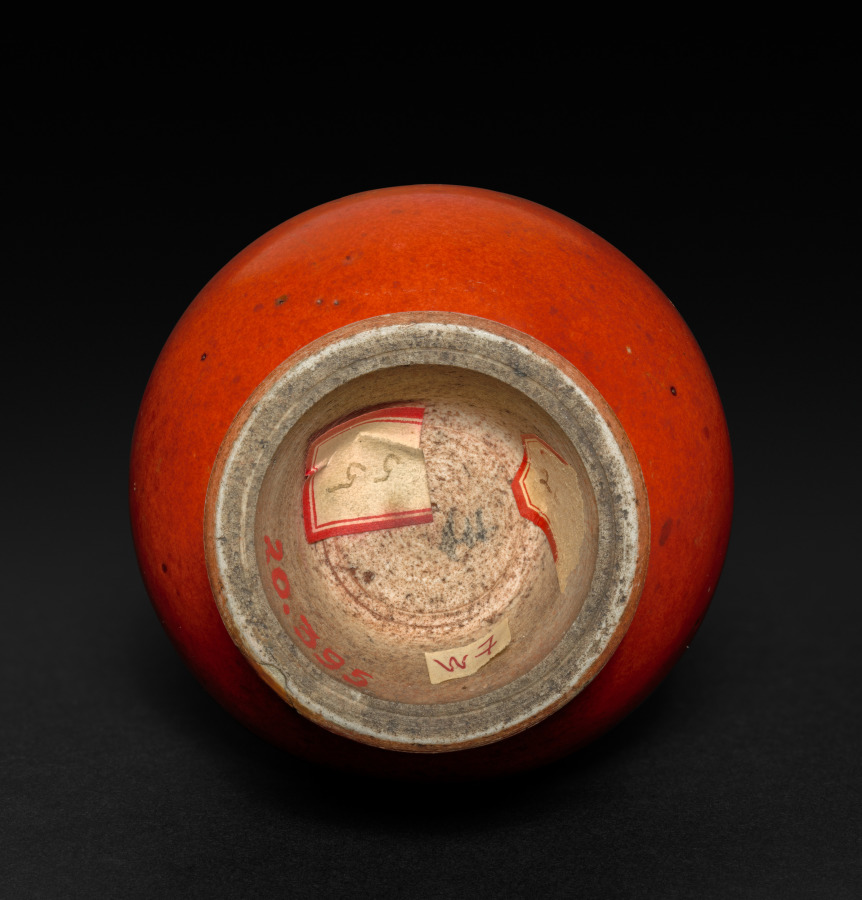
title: Vase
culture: China, Jiangxi Province, Jingdezhen kilns, Qing dynasty (1644–1911), Yongzheng reign (1722–35)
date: 1723–35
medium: porcelain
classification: Ceramic